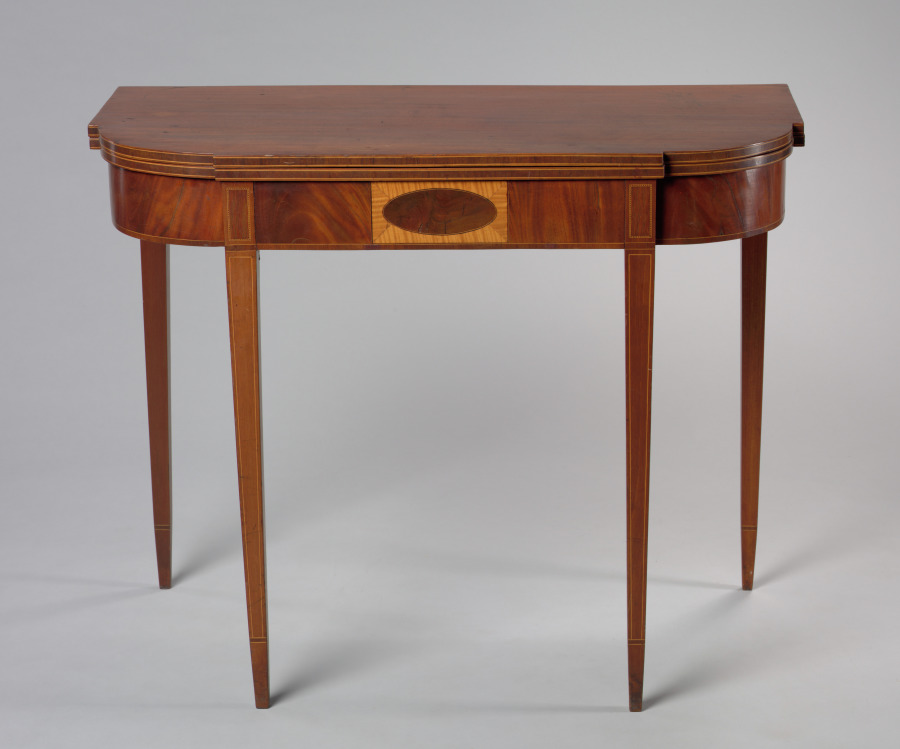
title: Table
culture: America, Sheraton Type, early 19th century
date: early 1800s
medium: mahogany with inlays of various woods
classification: Furniture and woodwork